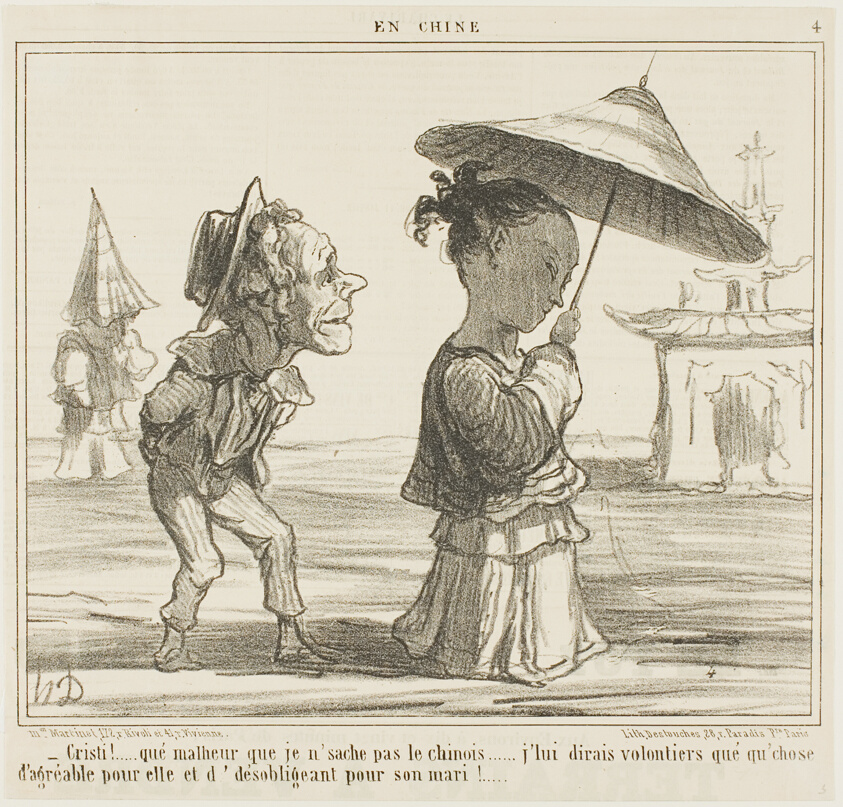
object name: Print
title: “- What a shame that I don't speak Chinese... I would love to say something real nice to her and something rather nasty to her husband,” plate 4 from En Chine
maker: Honoré Victorin Daumier; French, 1808-1879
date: 1859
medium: Lithograph on buff wove paper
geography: France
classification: lithograph; print; prints and drawing